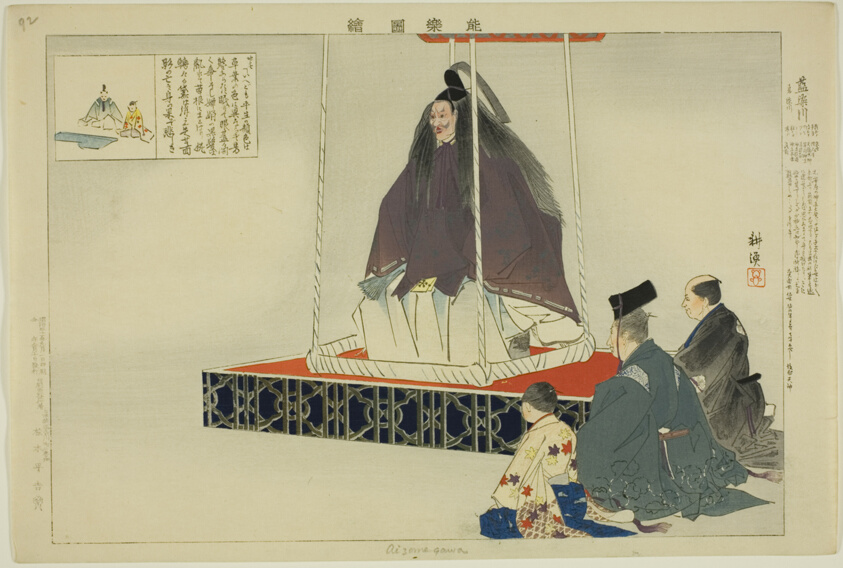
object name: Print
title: Aisomegawa, from the series "Pictures of No Performances (Nogaku Zue)"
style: Japanese (culture or style)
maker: Tsukioka Kogyo; Japanese, 1869-1927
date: 1898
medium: Color woodblock print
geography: Japan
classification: woodblock print; print; asian art